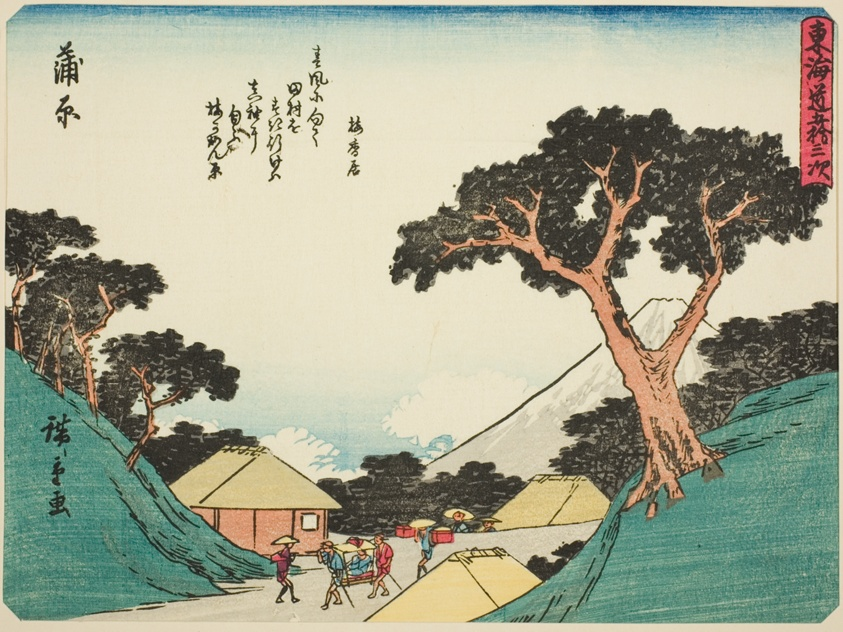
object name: Print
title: Kanbara, from the series "Fifty-three Stations of the Tokaido (Tokaido gojusan tsugi)," also known as the Tokaido with Poem (Kyoka iri Tokaido)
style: Japanese (culture or style)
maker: Utagawa Hiroshige 歌川 広重; Japanese, 1797-1858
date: c. 1837/42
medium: Color woodblock print; chuban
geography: Japan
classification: woodblock print; print; asian art